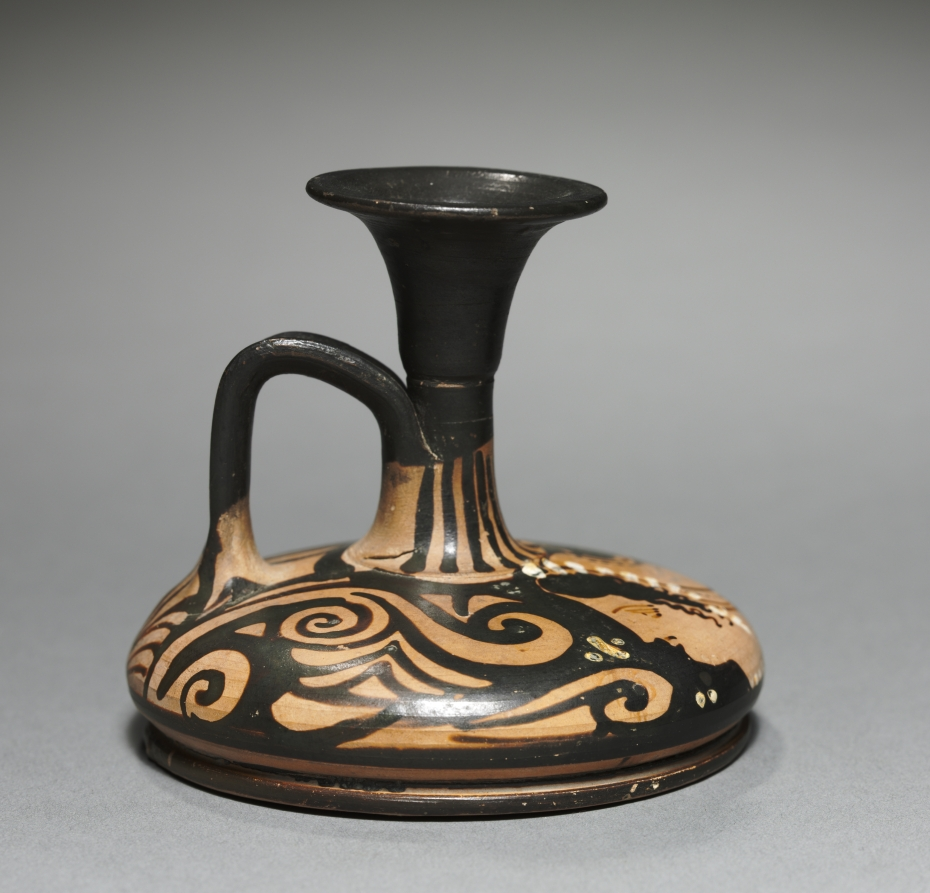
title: Red-Figure Squat Lekythos (Oil Vessel): Female Head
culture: South Italian, Apulian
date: 350–300 BCE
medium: ceramic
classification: Ceramic